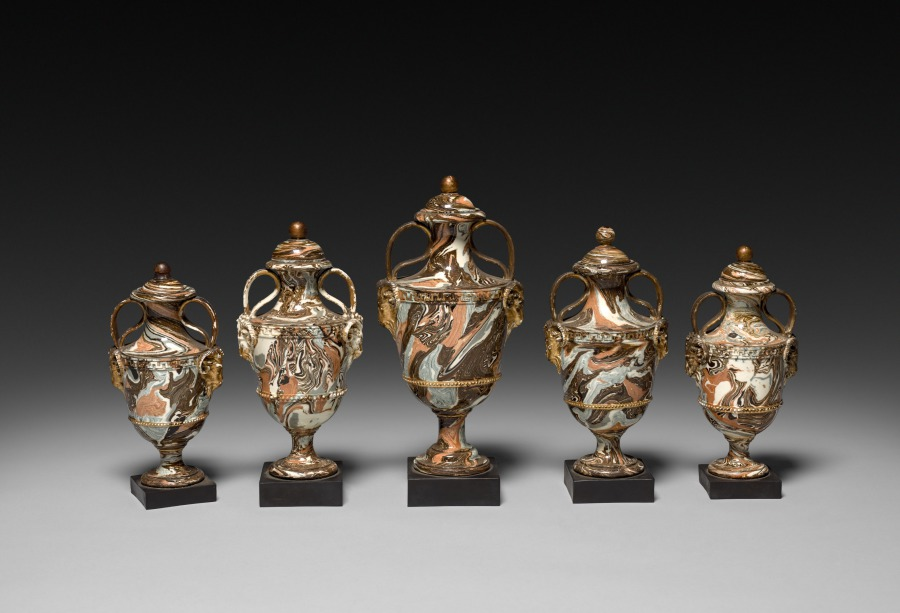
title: Urn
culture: England, late 18th or 19th century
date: late 1700s - 1800s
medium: earthenware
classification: Ceramic